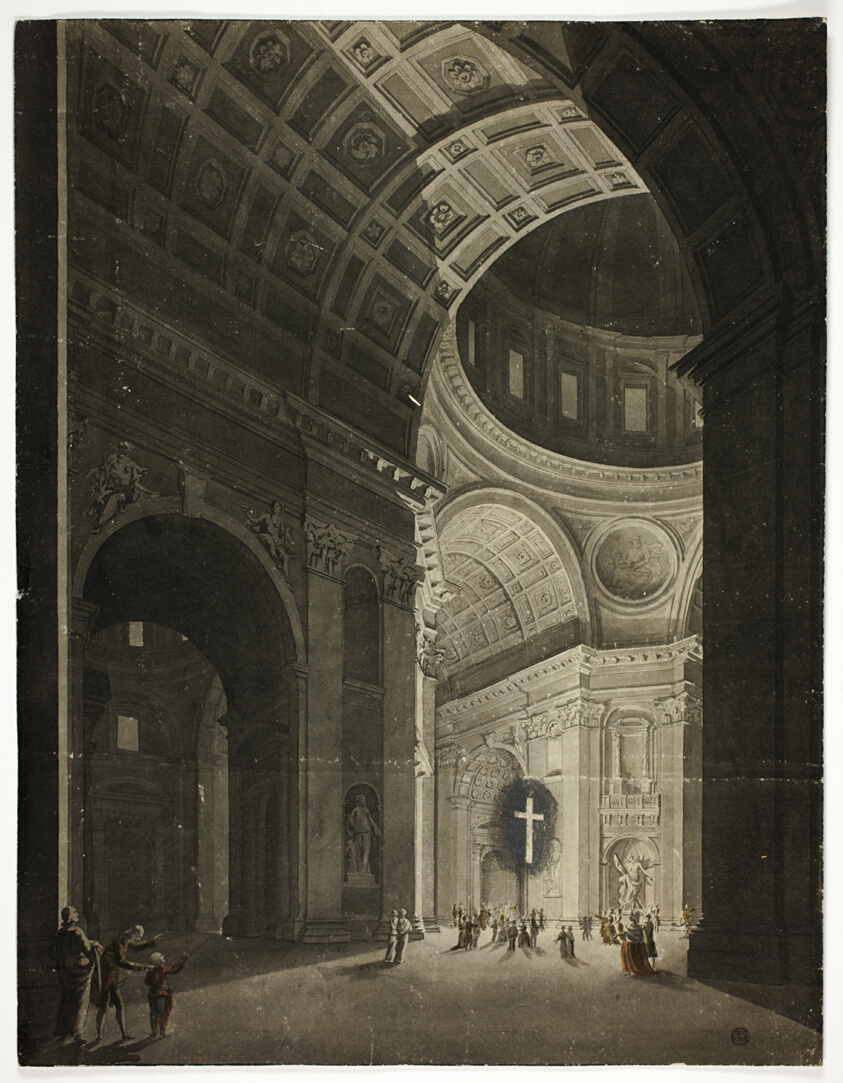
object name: Drawing and Watercolor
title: View of Crossing in Saint Peter's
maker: After Louis Jean Desprez; French, 1743-1804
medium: Pen and black ink and brush and black and gray wash, with touches of brown and yellow watercolor and graphite, on ivory laid paper, laid down on tan wove paper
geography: France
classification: ink or chalk wash; drawings (visual works); prints and drawing